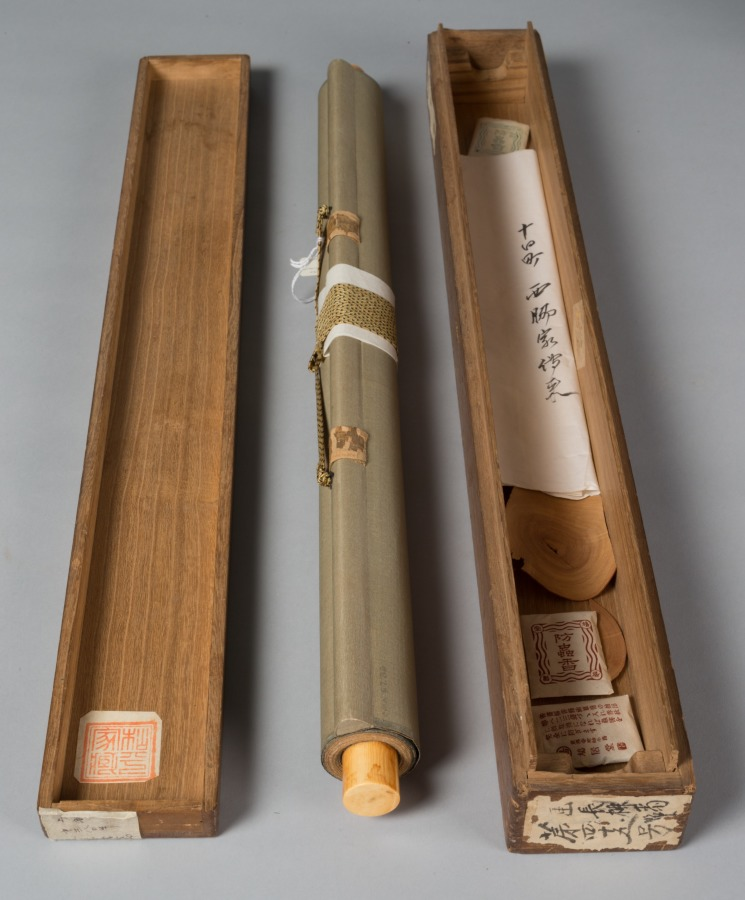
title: Emperor Minghuang Teaching Yang Gueifei to Play the Flute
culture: Japan, Muromachi period (1392–1573)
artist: Choryusai (Japanese)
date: late 1400s–early 1500s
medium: hanging scroll; ink and color on paper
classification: Painting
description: Minghuang, a prominent emperor of Tang (618-906) China and his consort, Yang Gueifei, have inspired many legends, paintings, and poetry in later Chinese culture. Through the study of Chinese literature and the collecting of Chinese paintings, tales of their lives and romance became well-known in Muromachi Japan.